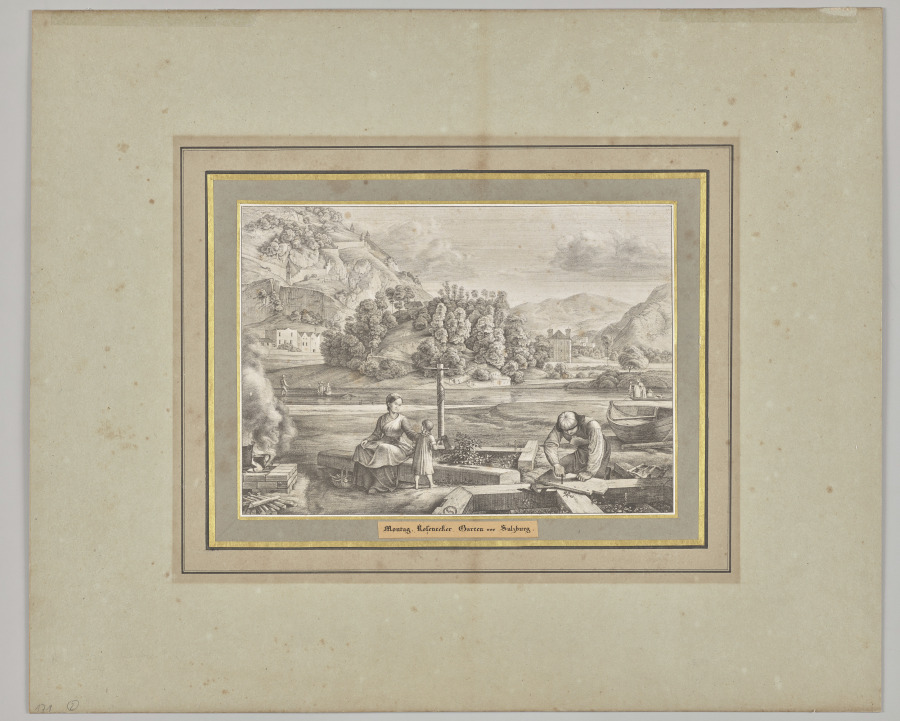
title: Monday. Rosenecker Garden in Front of Salzburg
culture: Germany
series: Seven Areas from Salzburg and Berchtesgaden. Arranged according to the seven days of the week, connected by two allegorical sheets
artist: Ferdinand Olivier (German, 1785–1841)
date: 1818–23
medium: lithograph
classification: Print